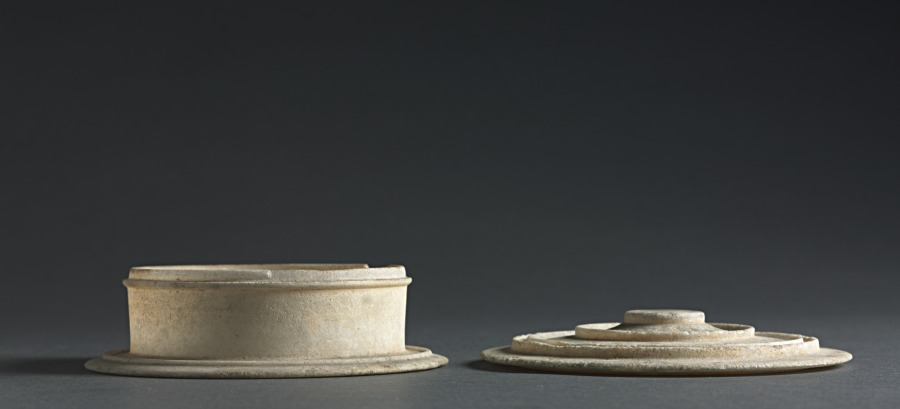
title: Pyxis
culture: Greece, Attic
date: 400–300 BCE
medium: marble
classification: Stone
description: Pyxides came in a huge variety of sizes, shapes, and materials in the ancient world. Images of pyxides in Greek art often show them being used by women, which has led scholars to believe that they may have been used to hold jewelry or cosmetics. This pyxis is one of few surviving examples made from stone, signifying that it may have had an elite owner.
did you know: This vessel has a threaded lid, like a modern mason jar, allowing it to be tightly sealed.